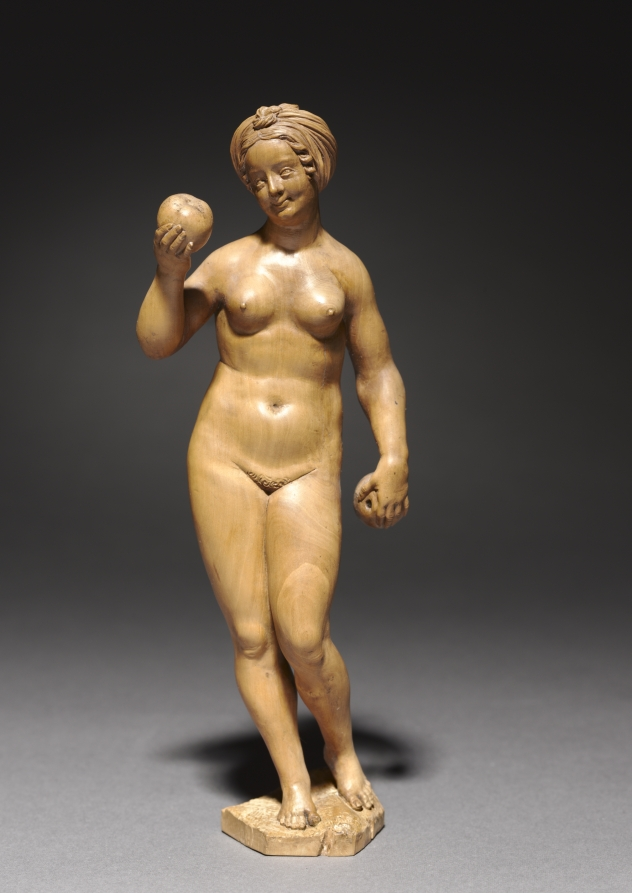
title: Eve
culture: Germany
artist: Daniel Mauch (German, 1477–1540)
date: c. 1535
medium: boxwood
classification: Sculpture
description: Mauch straddled the late medieval and Renaissance traditions across his career. These small-scale statuettes, however, each made from a single piece of boxwood, stem from the most progressive strands of Renaissance art in southern Germany, closely connected to developments in both Italian and German bronze sculpture. The bodies reveal Mauch's careful study of human anatomy as well as a rapport with Albrecht Dürer's well-known print of the same subject.